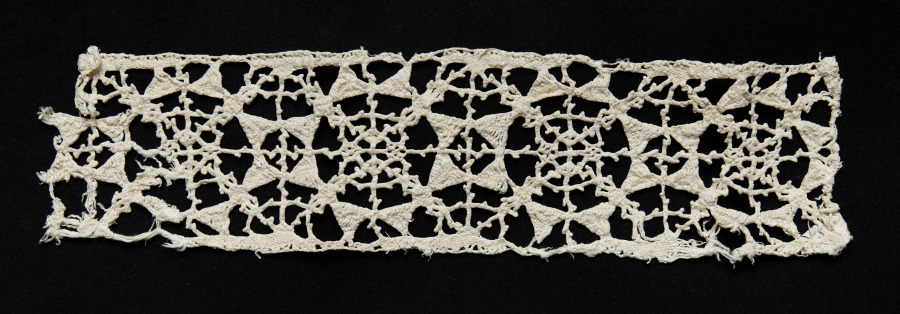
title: Lace Insertion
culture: Italy, Genoa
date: 1550–99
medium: Bobbin lace (needle lace, cutwork [punto tagliato] design)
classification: Lace